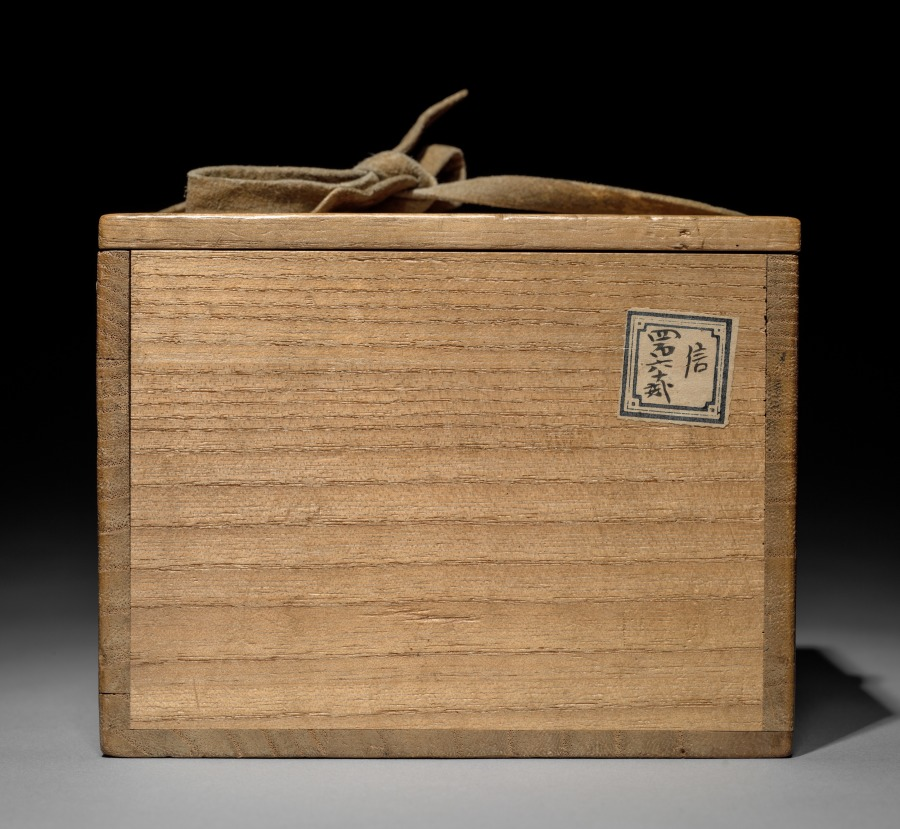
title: Tea Bowl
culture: Japan, Edo period (1615–1868)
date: 1600s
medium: stoneware with natural ash glaze (Shigaraki ware)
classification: Ceramic